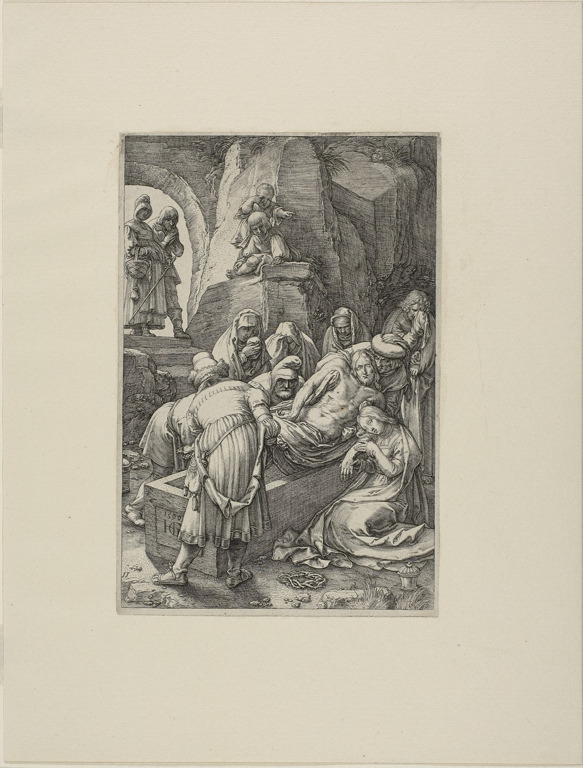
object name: Print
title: The Entombment, plate eleven from The Passion of Christ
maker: Hendrick Goltzius (Dutch, 1558-1617)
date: 1596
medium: Engraving in black on cream laid paper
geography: Netherlands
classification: engraving; paper; print; prints and drawing